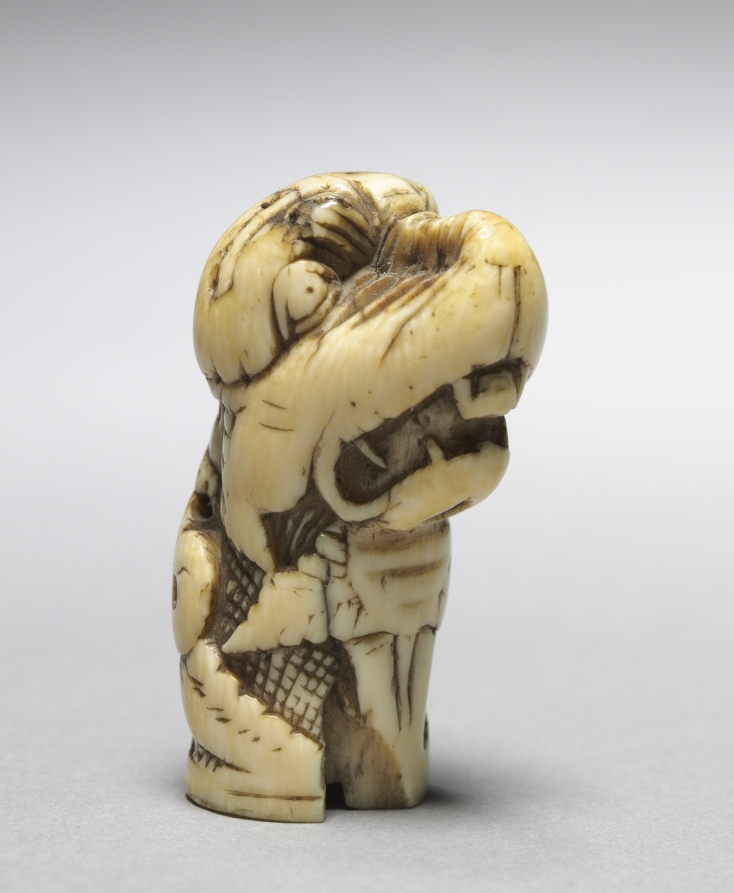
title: Dragon's Head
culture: Anglo-Norman?, Romanesque period, 12th century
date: 1100–1150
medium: walrus ivory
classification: Ivory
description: This exceedingly rare medieval carving, which recalls the more monumental carvings on Viking ship prows, may have been a finial for a diagonal member of a folding chair. The character of the head, the stylized acanthus leaves, and the foliage-spouting mask on the neck are characteristic of north European and Anglo-Norman Romanesque styles.